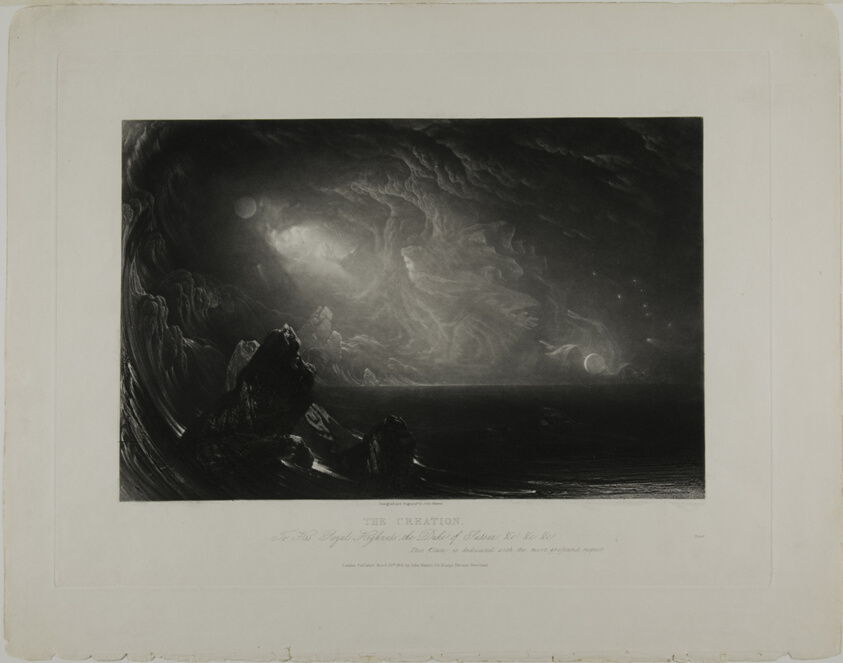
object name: Print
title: The Creation, from Illustrations of the Bible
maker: John Martin (English, 1789-1854)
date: 1831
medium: Mezzotint in black on ivory wove paper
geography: England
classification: mezzotint; print; prints and drawing